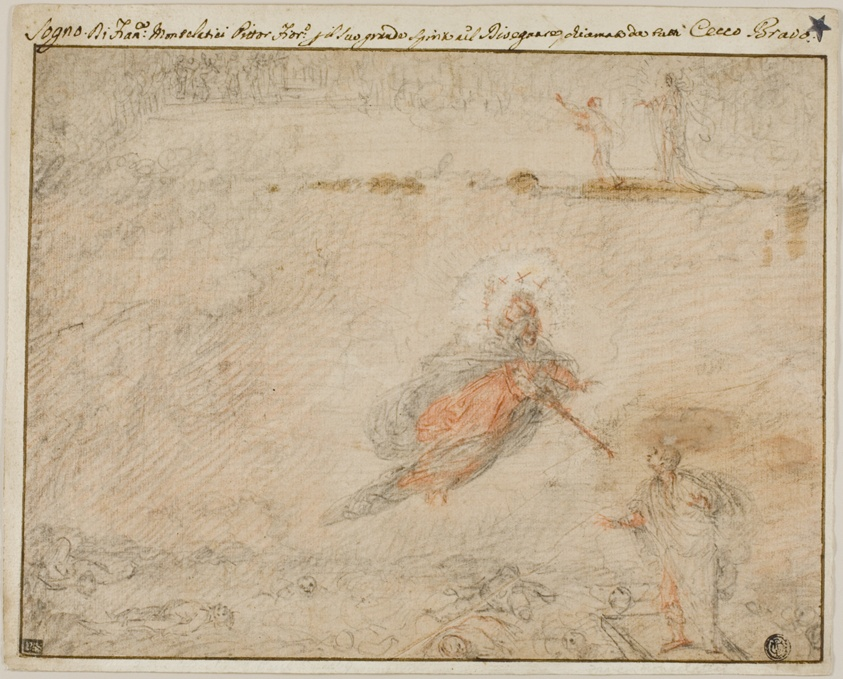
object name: Drawing and Watercolor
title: The Dream of Cecco Bravo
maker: Cecco Bravo (Italian, 1607-1661)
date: c. 1630-1660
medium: Black and red chalk, on tan laid paper, laid down on ivory laid paper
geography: Italy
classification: chalk; drawings (visual works); prints and drawing